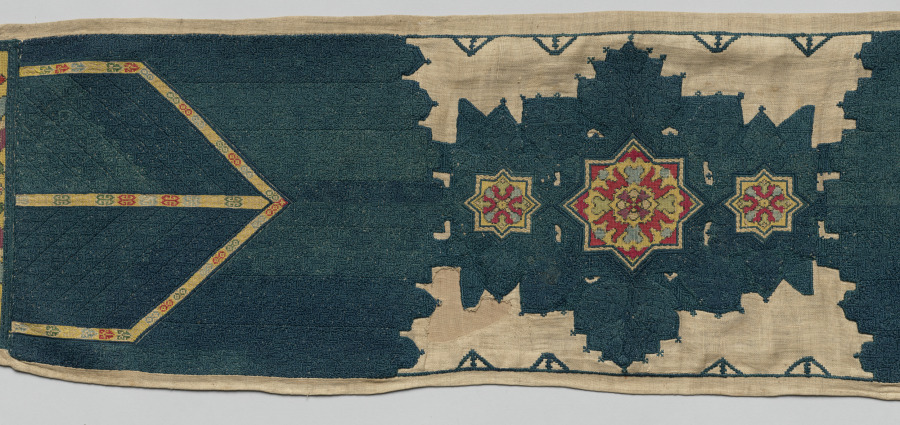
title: Furnishing textile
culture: Africa, North Africa, Morocco, Chefchaouen, Moroccan embroiderer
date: 1600s–1700s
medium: silk on linen tabby ground, embroidery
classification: Embroidery